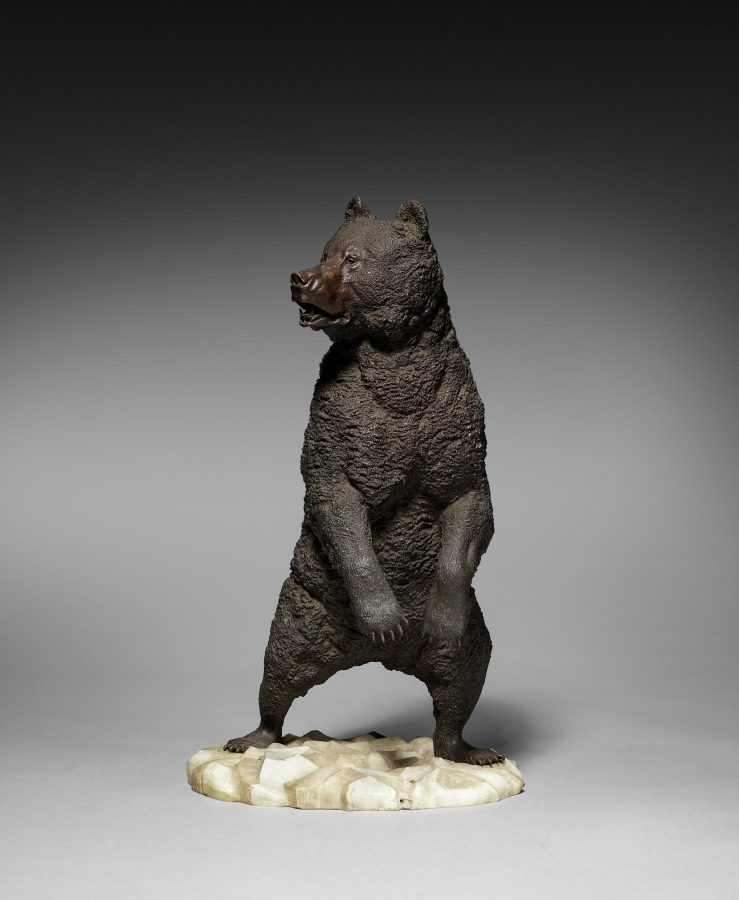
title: Bear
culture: Japan, Meiji period (1868–1912) to Shōwa period (1926–89)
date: c. 1900–1947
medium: bronze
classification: Sculpture